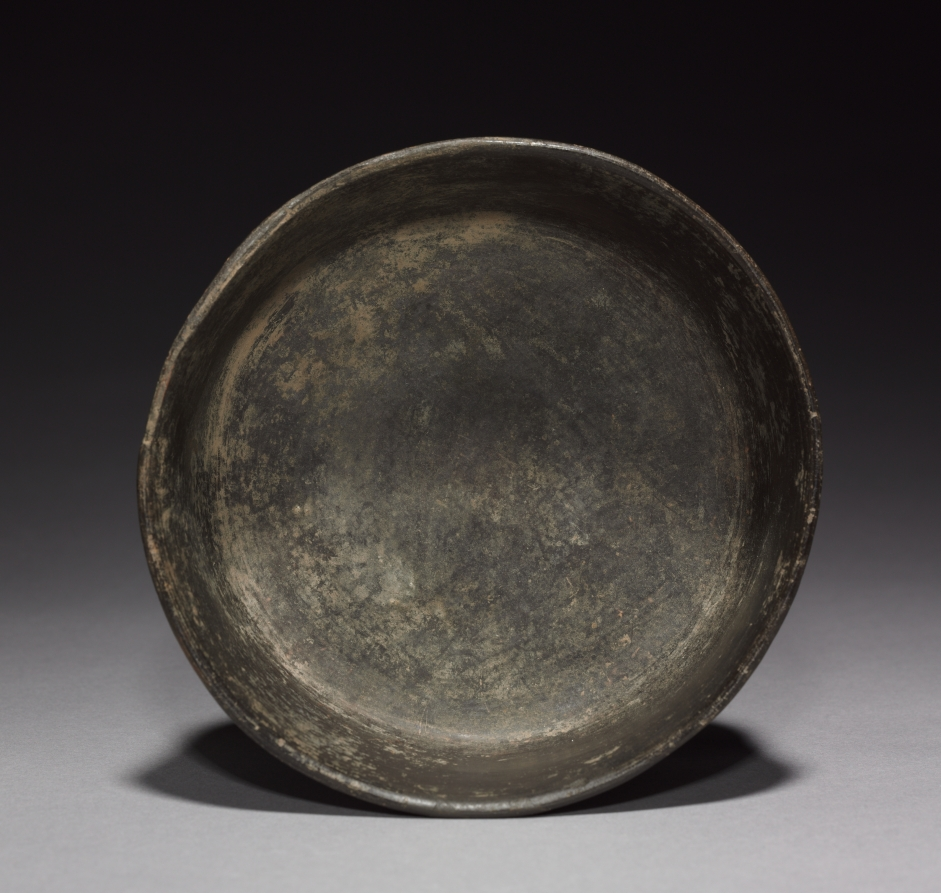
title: Bowl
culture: Central Mexico, Teotihuacán, Classic period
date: 1–550 CE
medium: ceramic, pigment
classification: Stone